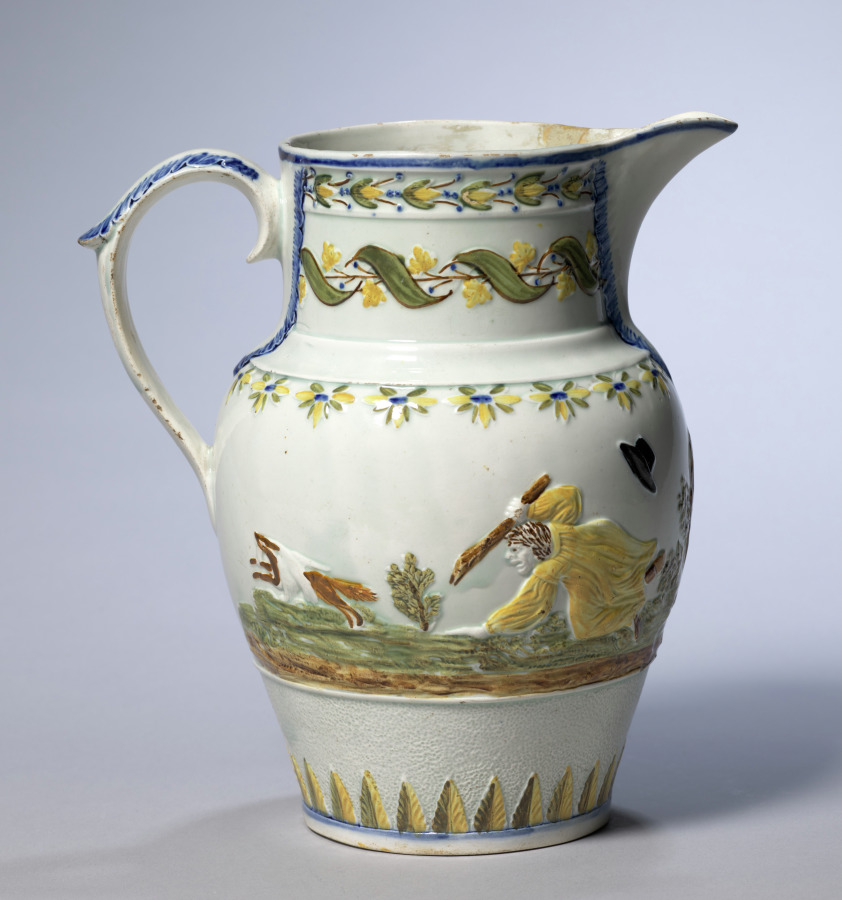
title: Jug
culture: England, Staffordshire, late 18th-early 19th Century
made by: Staffordshire Factory (British)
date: c. 1800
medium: earthenware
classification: Ceramic